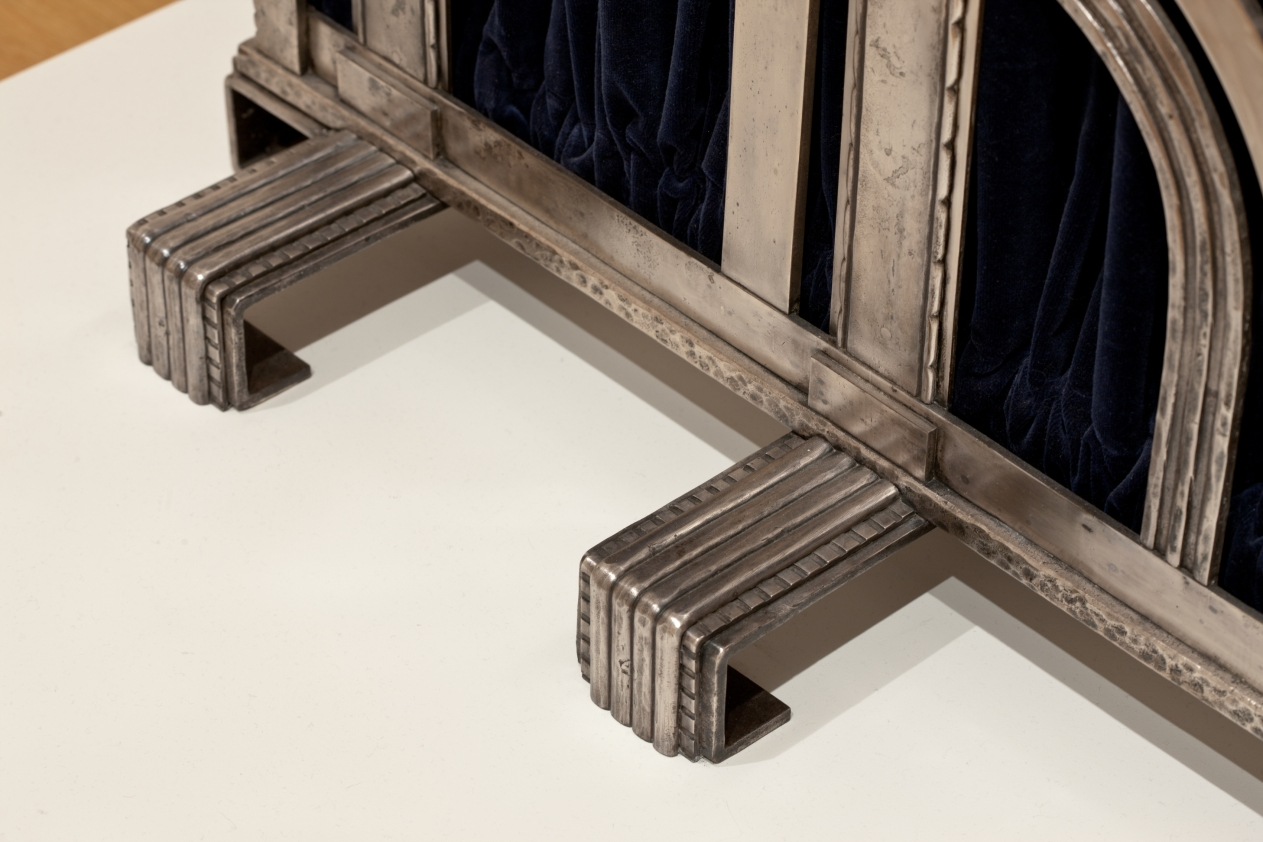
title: Muse with Violin Screen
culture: America, Ohio, Cleveland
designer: Paul Fehér (American, born Hungary, 1898–1990)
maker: Rose Iron Works (America, Ohio, Cleveland, est. 1904)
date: 1930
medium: Steel, brass; silver and gold plating, cotton velveteen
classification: Metalwork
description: Since the early years of the 20th century, the Rose Iron Works, a Cleveland supplier of architectural ornament, has produced distinguished metalwork. The company’s founder, Martin Rose, was born in Austria-Hungary and studied ornamental metalsmithing in Vienna prior to immigrating to Cleveland in 1902. In the 1920s, he hired a talented young Parisian designer, Paul Fehér, to work for the firm. Fehér’s designs, culminating in this massive screen, brought a modern European sensibility to the Rose Iron Works production. With its geometric patterning, highly stylized and abstracted natural forms, and the central figure reminiscent of the celebrated jazz singer Josephine Baker, this screen reflects the classic motifs of Art Deco design.